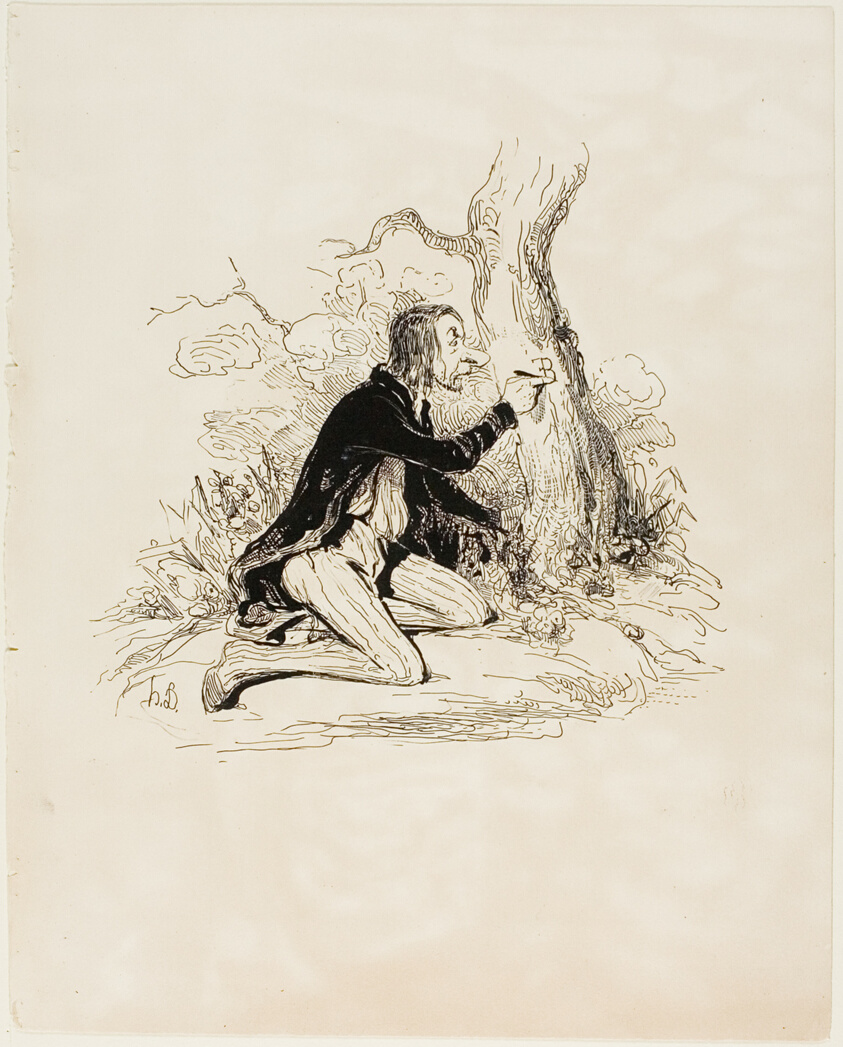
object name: Print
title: Poor young man! Just one more letter and his moral situation would become perfectly clear, plate 1 from Sentimens Et Passionsa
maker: Honoré Victorin Daumier; French, 1808-1879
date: 1840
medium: Lithograph in black on ivory wove paper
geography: France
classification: lithograph; print; prints and drawing